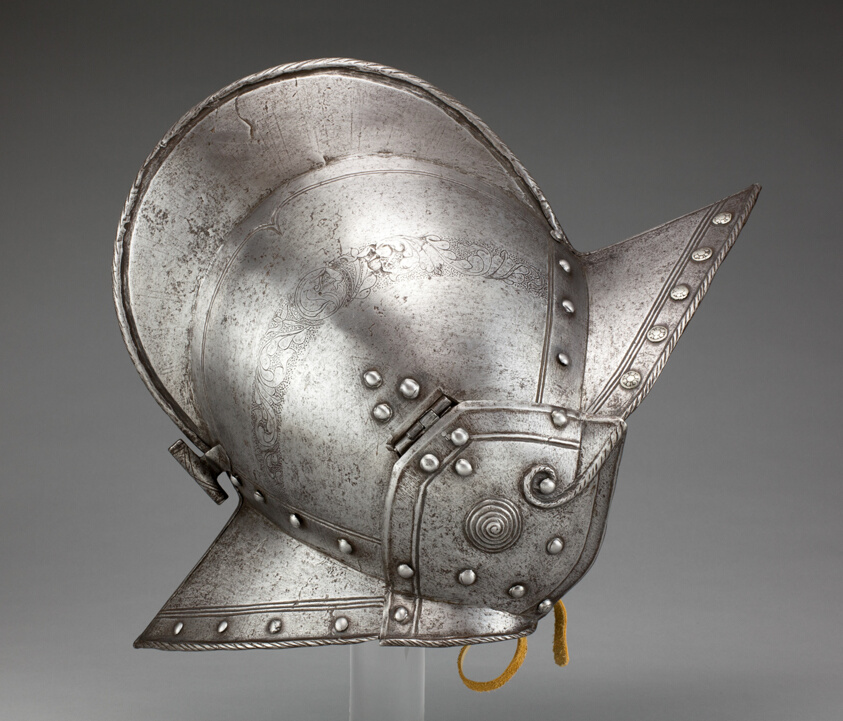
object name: Armor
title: Burgonet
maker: Northern German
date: c. 1580/90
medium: Steel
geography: Northern Germany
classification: suit-helmet; armor; arms and armor